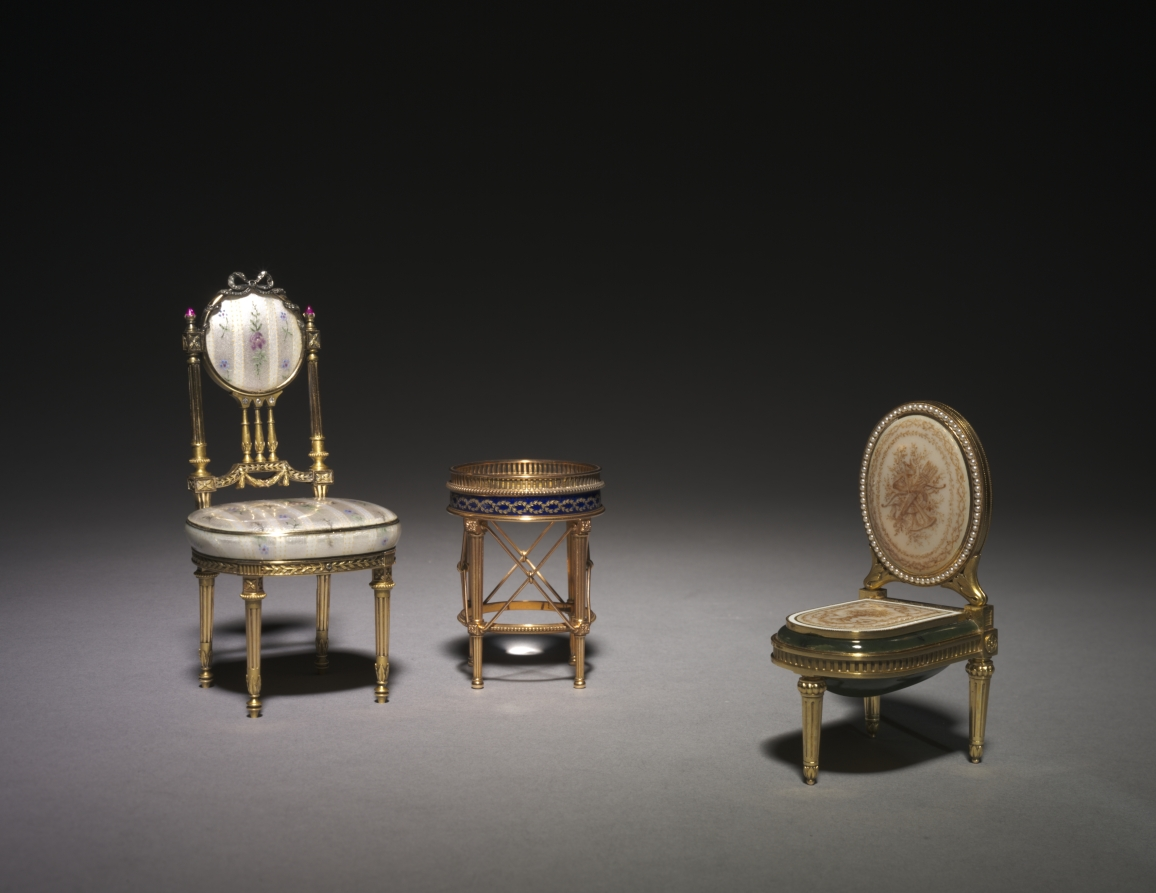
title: Miniature Bathroom Chair (Bidet)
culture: Russia, St. Petersburg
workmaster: Henrik Wigström (Russian, 1862–1923)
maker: House of Fabergé (Russian, 1842–1918)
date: 1908–17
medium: gold, nephrite, enamel, pearls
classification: Miscellaneous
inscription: Kokoshnik, 72, lower case alpha; 72; H.W. [initials of worksmaster Henrik Wigström]; Fabergé; 25256 [scratched].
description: The giving of small precious objects as intimate gifts between family members within the imperial court was spurred by the House of Fabergé's seemingly endless supply of bejeweled utilitarian objects decorated as expensively as possible, such as this stamp moistener disguising as an exquisite miniature bathroom chair (bidet) in the Louis XVI taste of the late 1700s.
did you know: The seat of this miniature bathroom chair cleverly opens to reveal a small compartment probably containing a damp sponge or ball of cotton to moisten stamps on a desk.